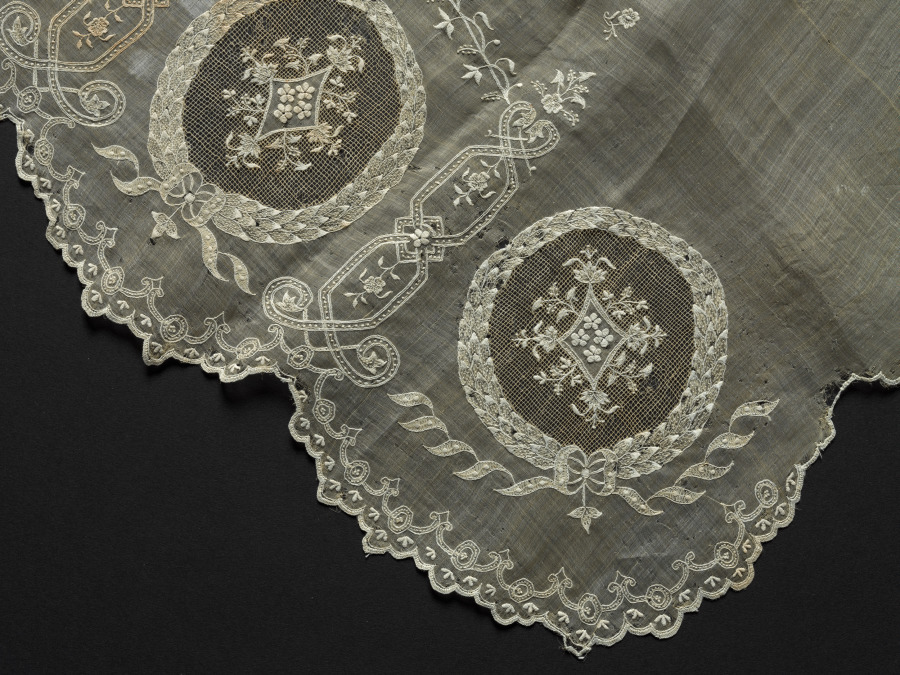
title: Lace Fichu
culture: Philippines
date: 1800s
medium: Plain weave piña cloth: needle lace and embroidery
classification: Embroidery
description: This square textile is made of fine piña fiber in plain weave. Two edges are finished with wide hand-embroidered cotton borders composed of oval medallions enclosing floral motifs, linked by scroll and leaf elements, and completed with a scalloped outer edge. The placement of embroidery on only one half suggests folding, consistent with this textile’s possible use as a fichu.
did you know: A fichu is a large, square kerchief worn by women to fill in the low neckline of a bodice.